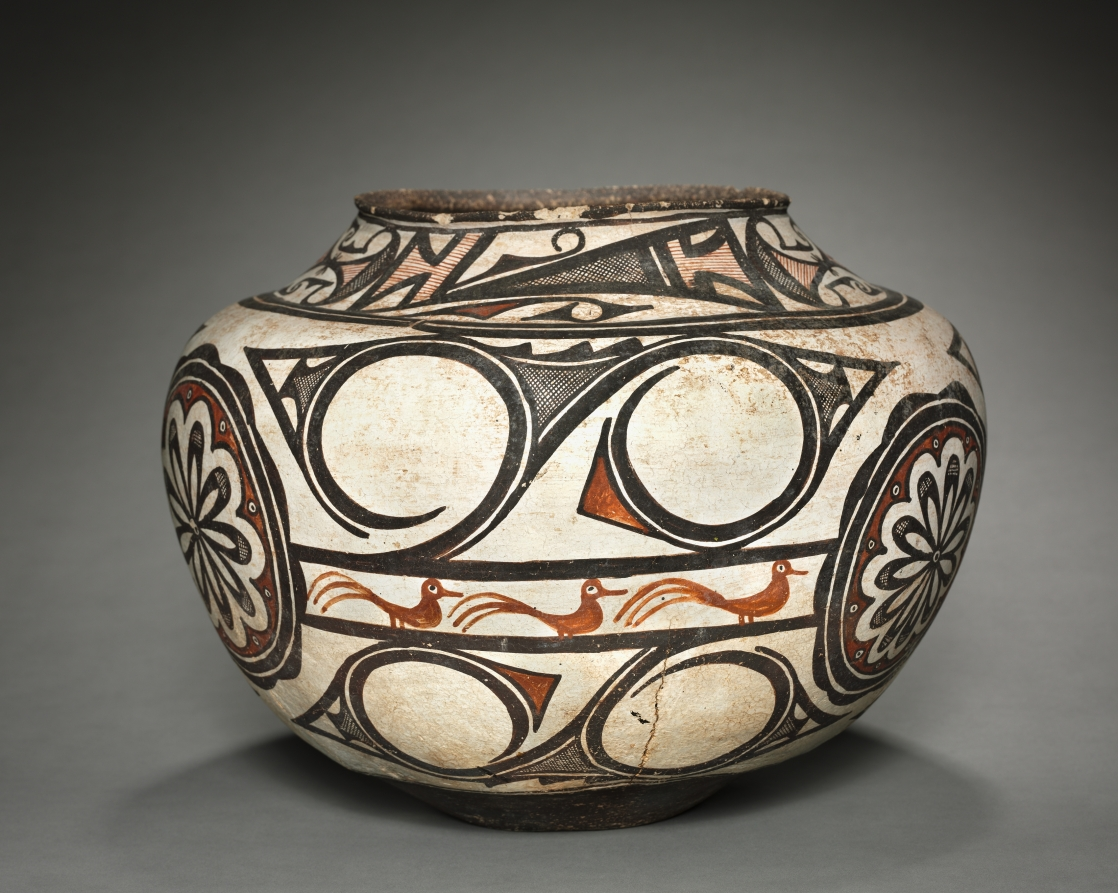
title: Water Jar (Olla) with Rosettes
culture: Native North America, Southwest, New Mexico, Zuni (A:shiwi) Pueblo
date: 1880s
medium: ceramic, slip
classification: Ceramic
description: In the past, motifs painted on Zuni (A:shiwi) ceramics likely held symbolic meanings but, if so, they are largely lost to memory—or at least the Zuni do not discuss them today. Where known, they seem to concern water, verdant crops, and abundant wildlife, also the focus of much Pueblo religious life. For instance, the large, triangular, blade-like forms around this vessel’s neck may represent the thunder knife used in many ceremonies. The petaled forms in circular rosettes refer to sunflowers.